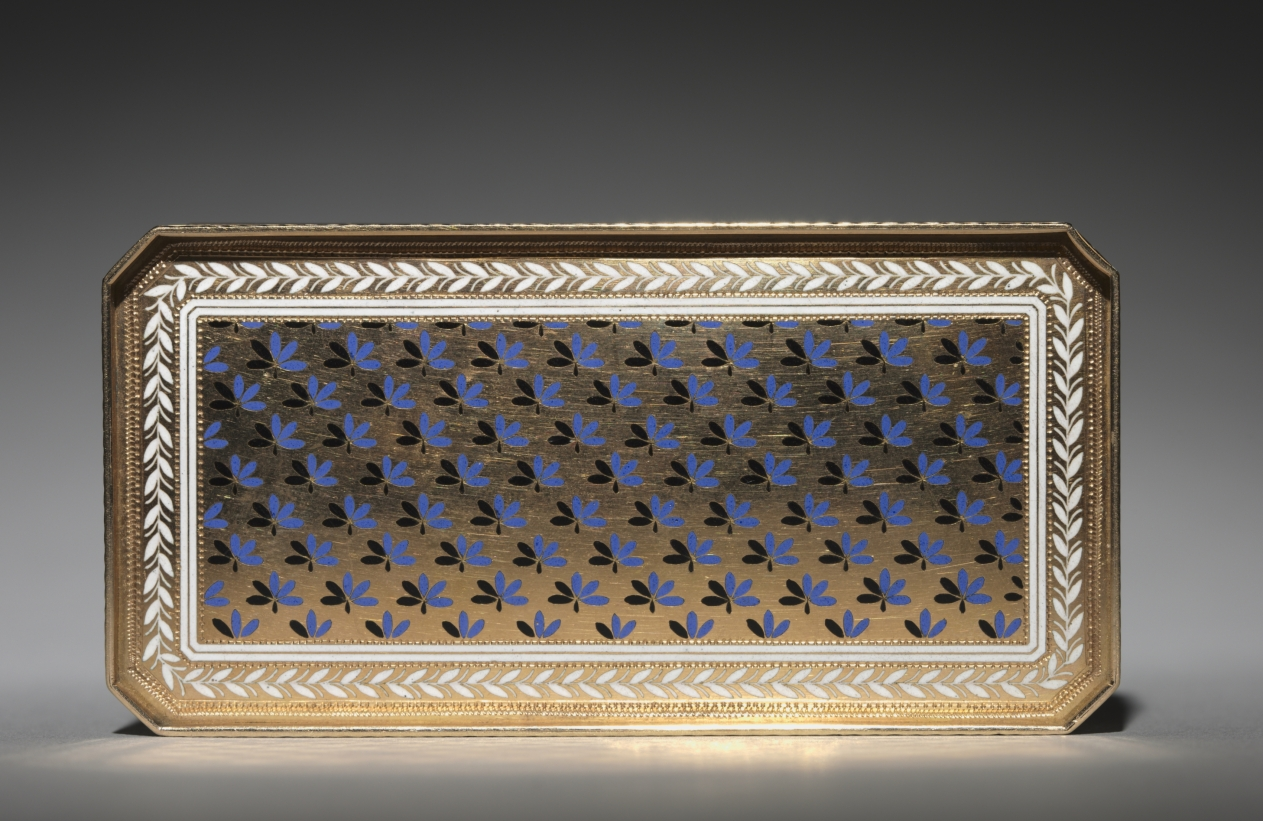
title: Box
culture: Switzerland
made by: probably by F. Joanin (Swiss)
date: c. 1810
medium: gold and enamel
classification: Miscellaneous